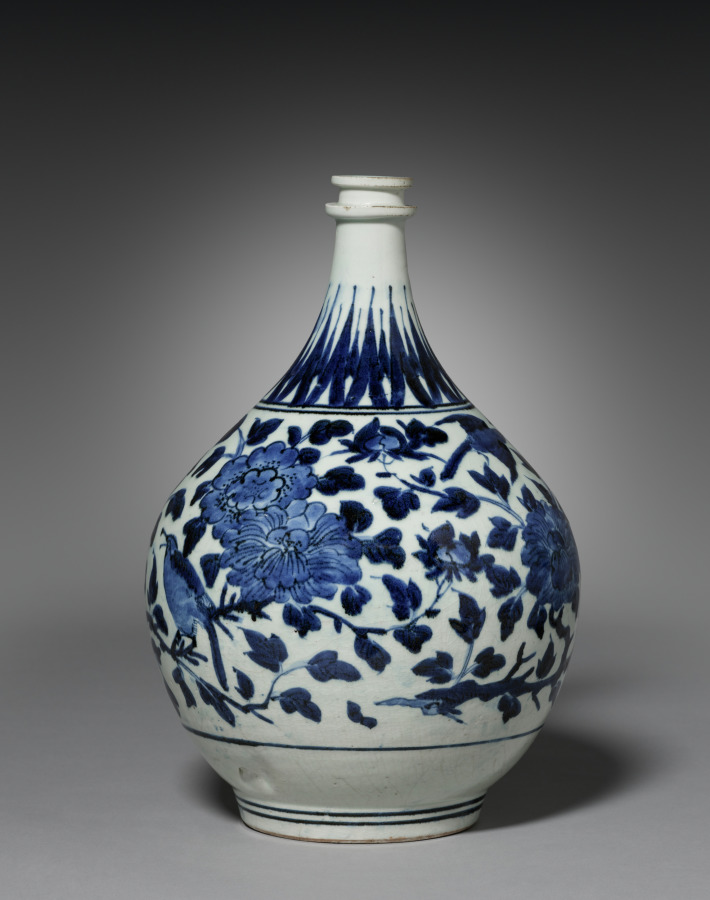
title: Medicine Bottle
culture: Japan, Edo period (1615–1868)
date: 1670s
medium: porcelain with underglaze blue decoration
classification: Ceramic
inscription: "I.C." on bottom (probably made for Joannes Camphuys, 1634–1695).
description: While inspired by medicine jars used in European pharmacies, this bottle was likely decorative. It may have been exported by the Dutch East India Company, a powerful trading company from the Netherlands. In Japan, it operated from Deshima, a man-made island in Nagasaki harbor created in 1636. The initials “I. C.” appear on the base. As the letter J was often transposed with the letter I in Europe of the 1600s, some scholars believe the bottle may have been made for Johannes Camphuys (1634–1695), who was in charge of the Dutch East India Company’s operations in Deshima in 1671.